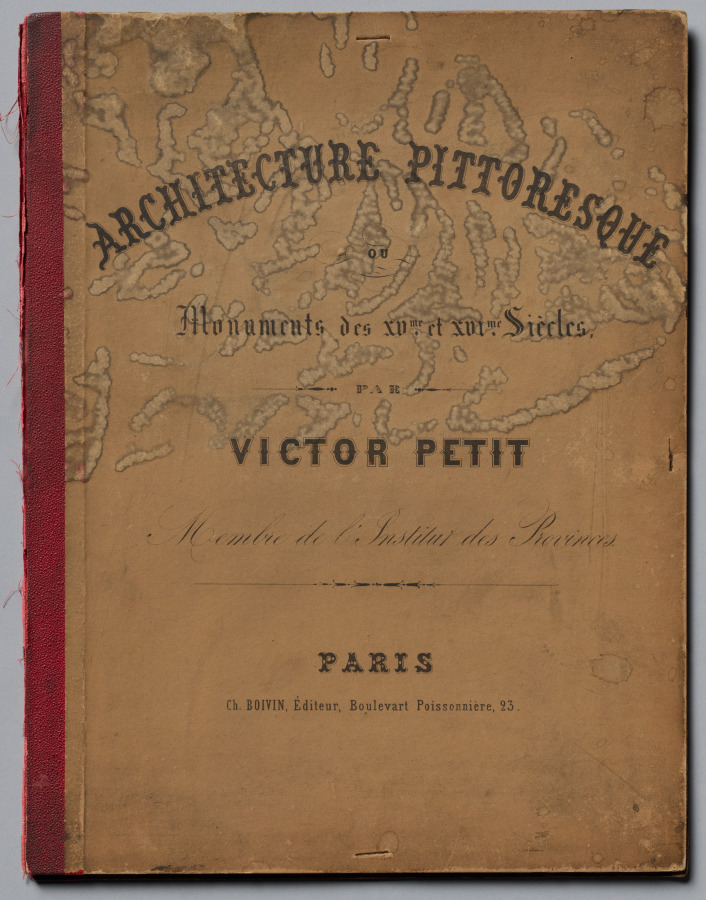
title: Architecture Pittoresque ou Monuments des xveme. Et xvieme. Siecles: Chateaux De France des XV et XVI Siecles: Cover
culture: France, 19th century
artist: Victor Petit (French, 1817–1874)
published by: Charles Boivin, Paris (publisher and editor); Lith de Godard a Paris (printer)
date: published 1860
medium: front and back cover, from portfolio of 100 lithographs with tint stone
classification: Portfolio